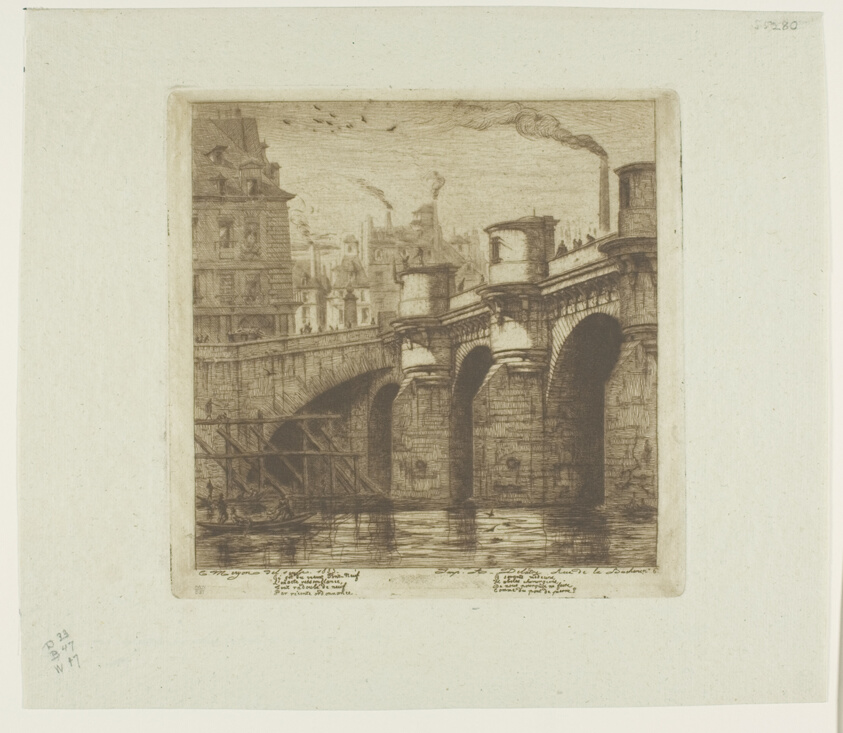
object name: Print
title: Pont-Neuf, Paris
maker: Charles Meryon (French, 1821-1868); printed by Auguste Delâtre (French, 1822-1907)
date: 1853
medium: Etching and drypoint on verdâtre (greenish) laid paper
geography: France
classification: etching; print; prints and drawing